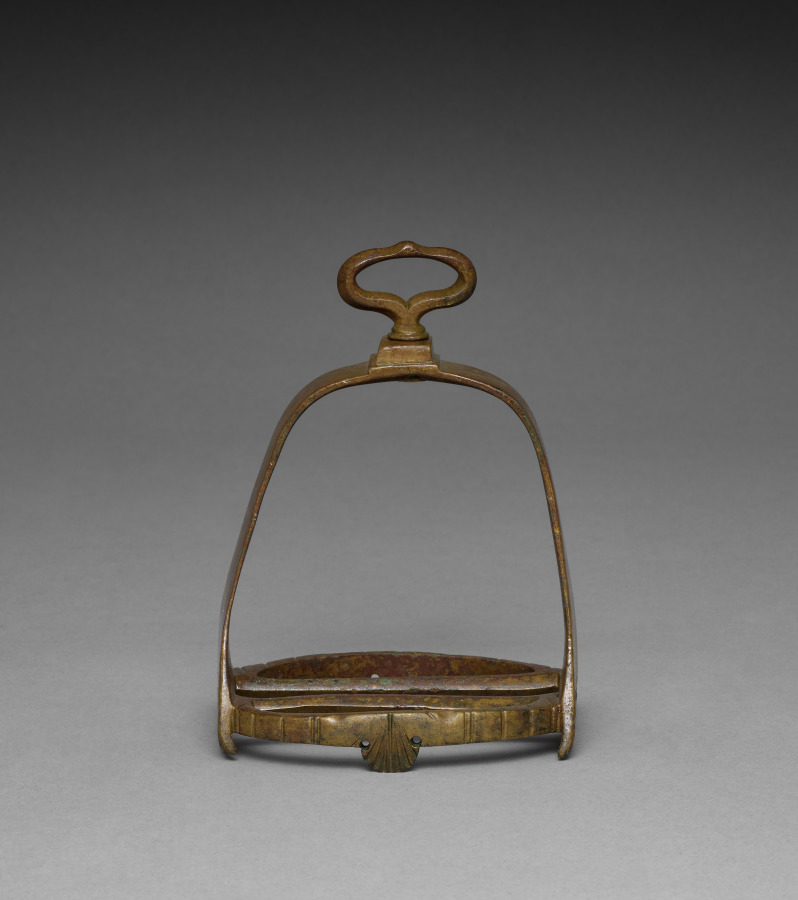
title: Stirrup (1 of 2)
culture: England (?), 17th century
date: 1600s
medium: brass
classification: Arms and Armor